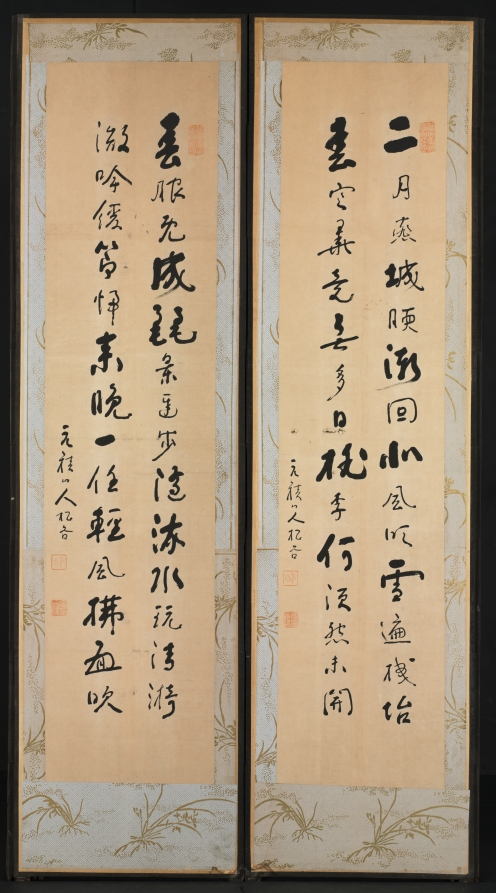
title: Painting of One Hundred Themes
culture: Korea, Joseon dynasty (1392–1910)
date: late 1800s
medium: Ten-panel folding screen affixed with album leaves (obverse), calligraphy (reverse), ink and color on silk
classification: Painting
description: The front of this screen features an assortment of subjects: birds and flowers, landscapes, and scenes of everyday life, mostly in monochromatic ink with light colors. The screen’s reverse side conveys a number of classical poems about the fleeting beauty of the four seasons. Traditionally, only one side of a folding screen bears painted or embroidered images, since these were used as a background furnishing. In Korean houses by the 1800s and early 1900s, however, two-sided folding screens became noticeably popular, possibly inspired by Japanese double-sided folding screens, which mainly served as room dividers in Japanese households.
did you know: The way of displaying small images of various subjects became one of the most popular type of painting toward the end of the 19th century.